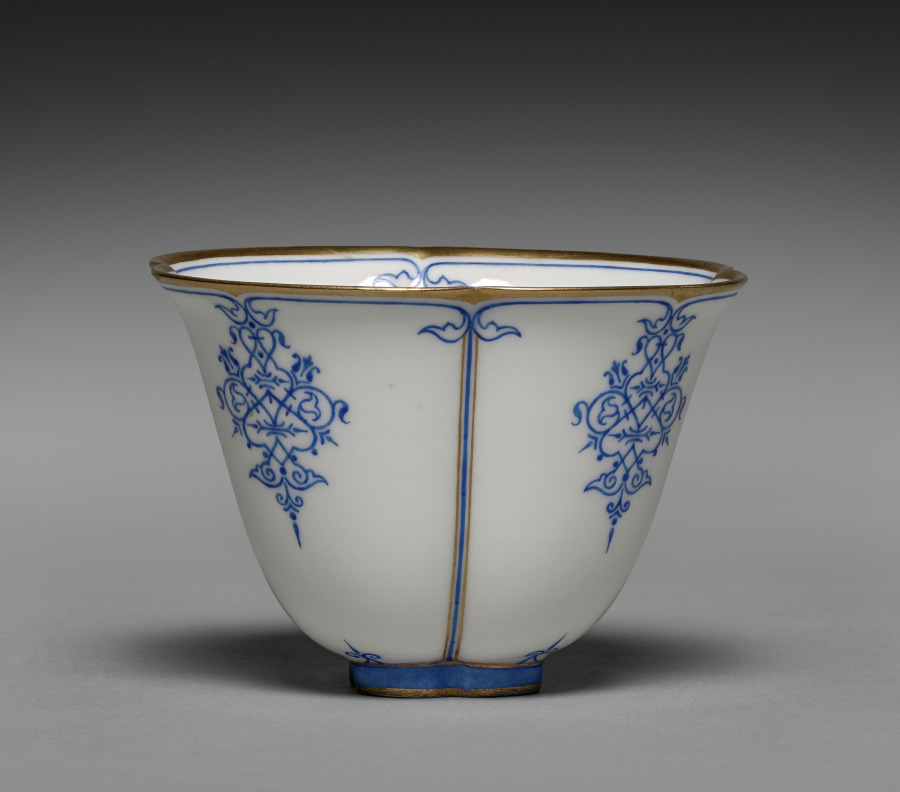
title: Cup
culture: France, Sèvres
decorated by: Guyonnet (French)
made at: Sèvres Porcelain Factory (French, est. 1756)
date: c. 1848–55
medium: hard-paste porcelain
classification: Ceramic